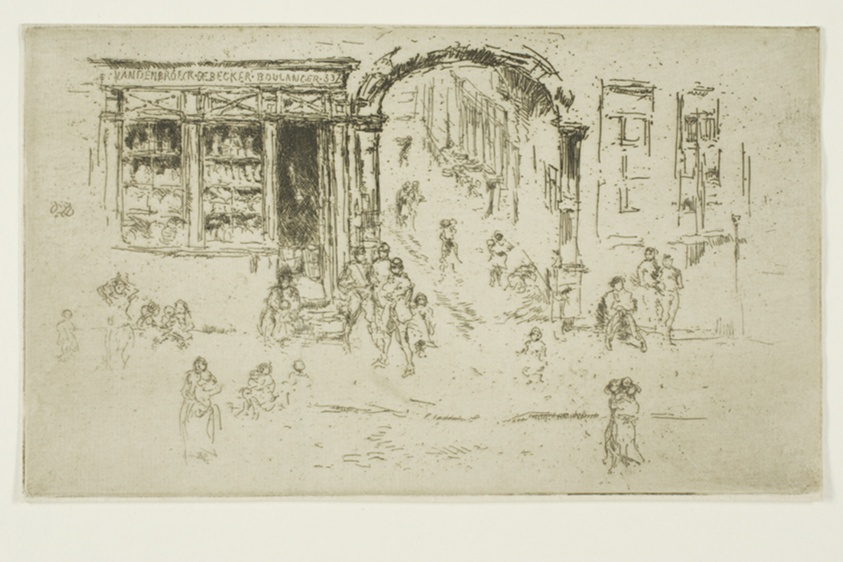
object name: Print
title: Archway, Brussels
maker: James McNeill Whistler (American, 1834-1903)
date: 1887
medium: Etching with foul biting in black ink on cream laid paper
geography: United States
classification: etching; foul biting; print; prints and drawing; paper